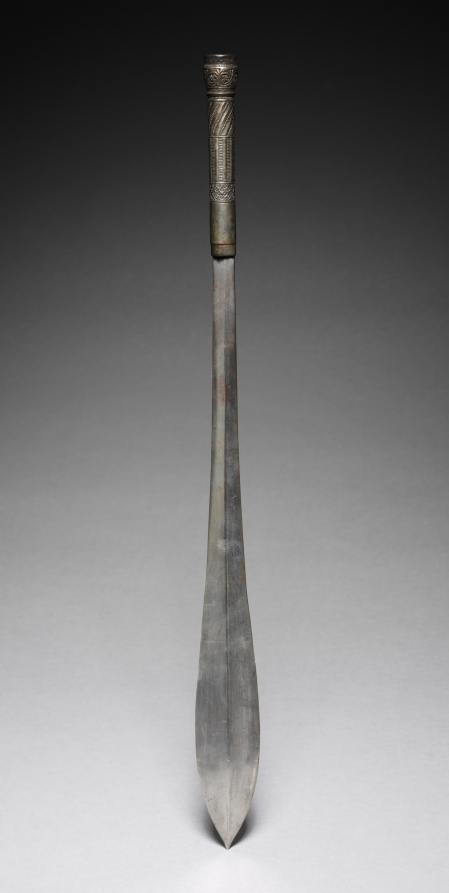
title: Dagger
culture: Africa, East Africa, Kenya or Uganda, unknown maker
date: by 1916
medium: Silver and metal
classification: Arms and Armor